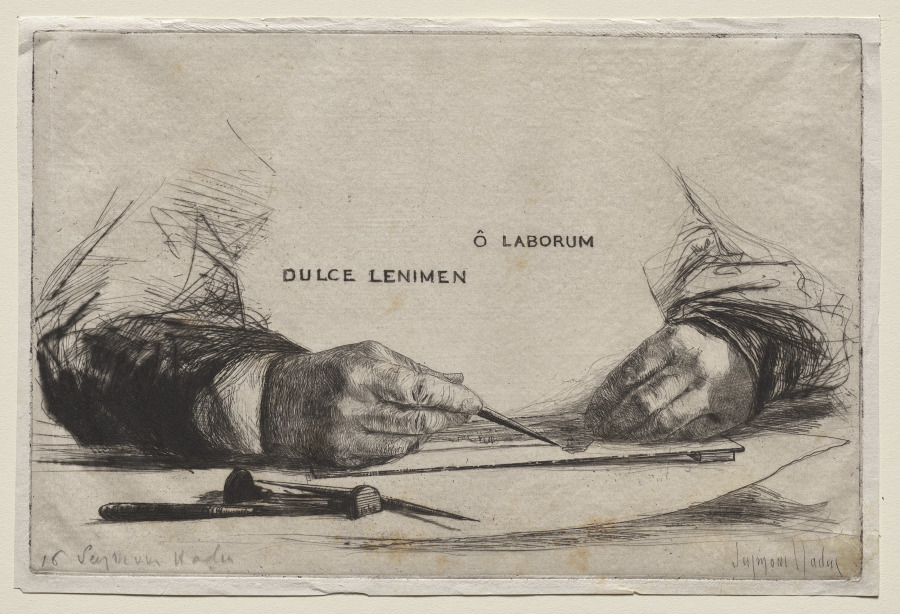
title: Hands Etching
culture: England, 19th century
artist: Francis Seymour Haden (British, 1818–1910)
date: 1865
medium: etching and drypoint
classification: Print